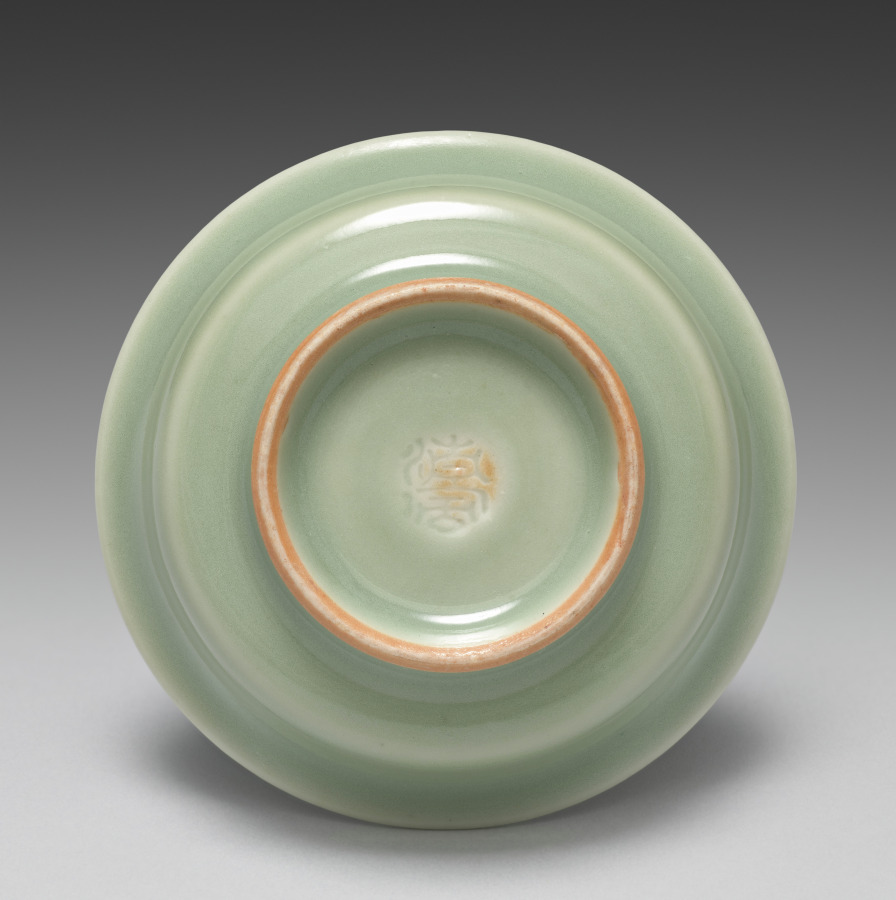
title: Saucer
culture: Japan, Meiji period (1868–1912)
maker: Seifū Yohei III (Japanese, 1851–1914)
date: 1893–1914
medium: One from a set of ten dishes; porcelain with green glaze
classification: Ceramic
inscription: 清風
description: Yohei III’s main output for his sophisticated clientele was in the form of tea sets and dining sets. He created a range of dishes in green glazes. He often produced in pairs, sets of five, or sets of ten. For this set of ten small dishes in a simple, round form that emphasizes the glaze above all, the box lid designates the piece as seiji, or green-glazed porcelain, using a general term for the extensive palette of green glazes often called celadon in English. The box lid further identifies the dishes themselves as tōchō, literally “bean-sized saucers,” a size that makes them suitable for dipping sauces.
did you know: The ten dishes in this set are stored in stacks of five in a two-compartment box.